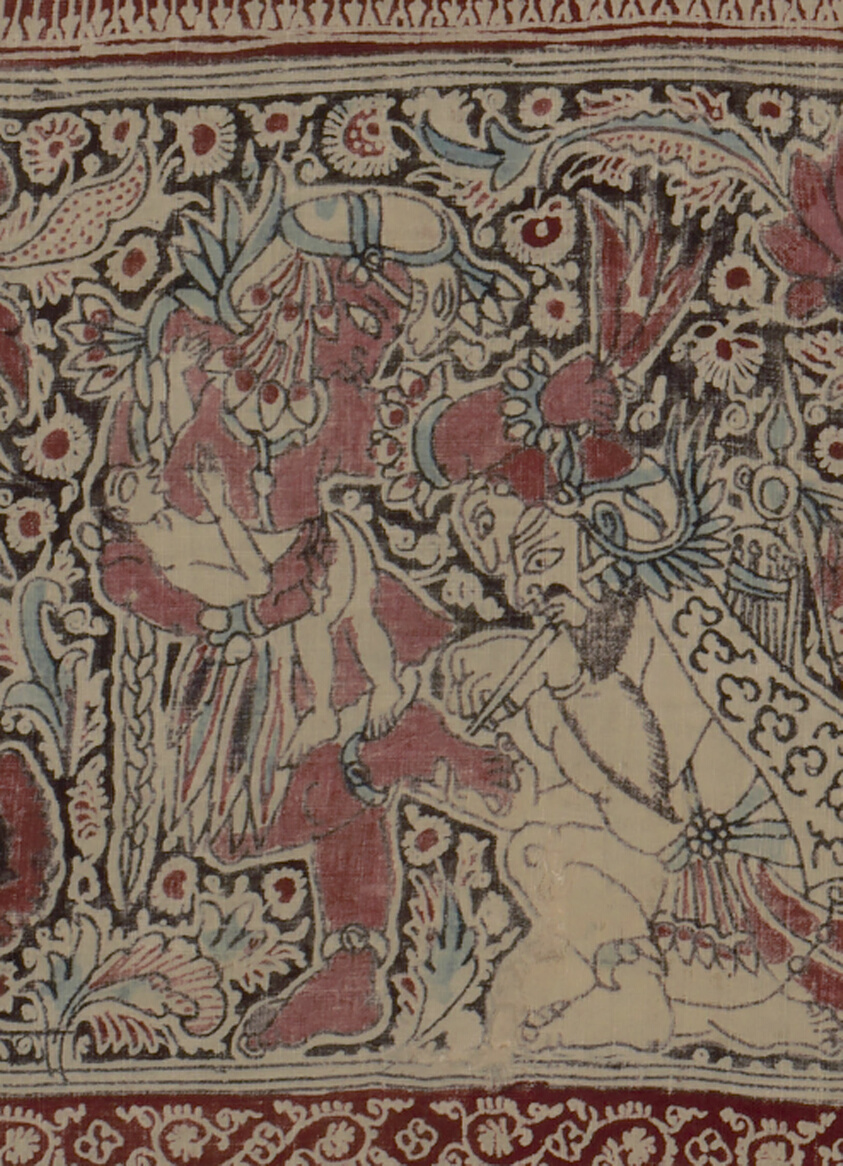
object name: Textile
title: Painted cotton with medallion and figures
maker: Deccan, India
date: 15th century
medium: cotton, plain weave; painted mordant; resist-dyed; painted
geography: India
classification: textile; weaving - printed